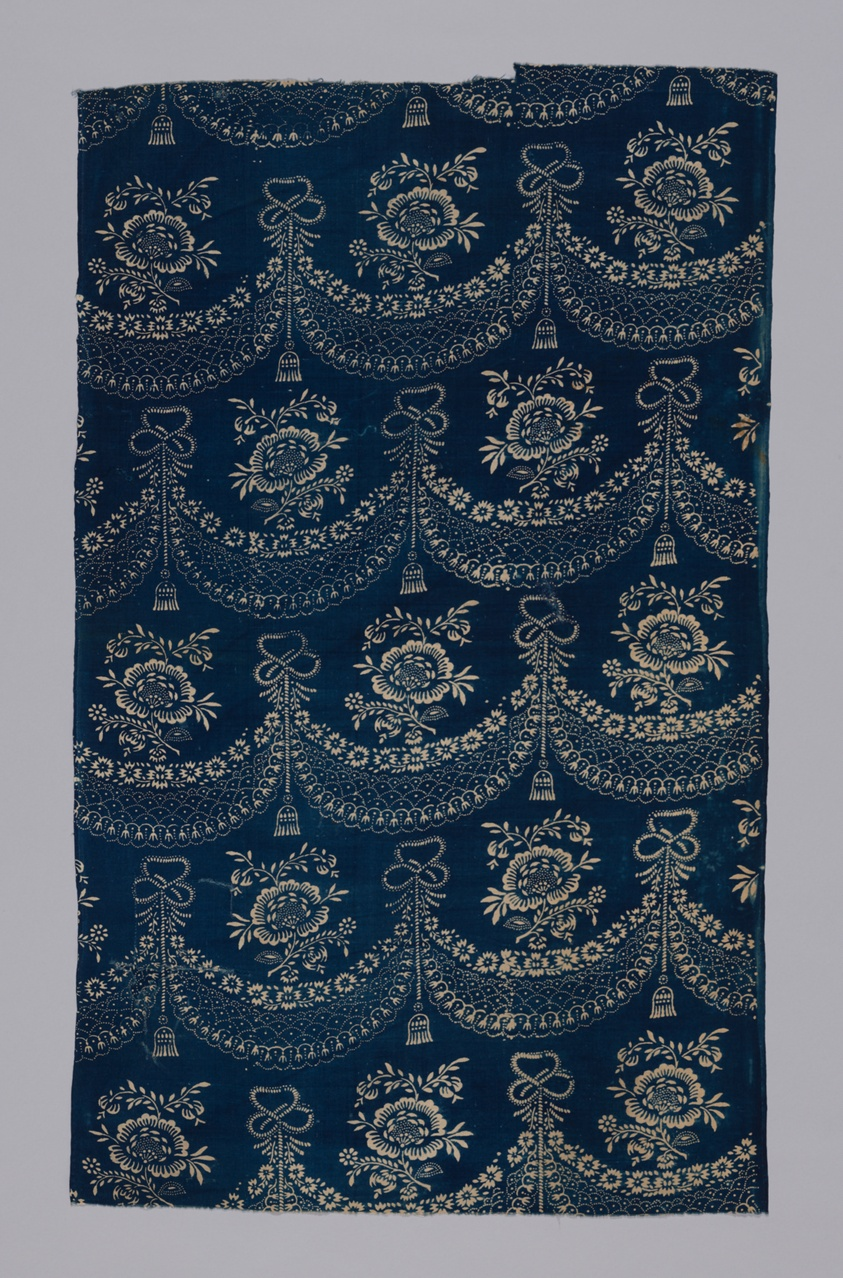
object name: Textile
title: Panel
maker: France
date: 18th century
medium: Cotton, plain weave; resist printed with blocks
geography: France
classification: textile; weaving - printed; weaving